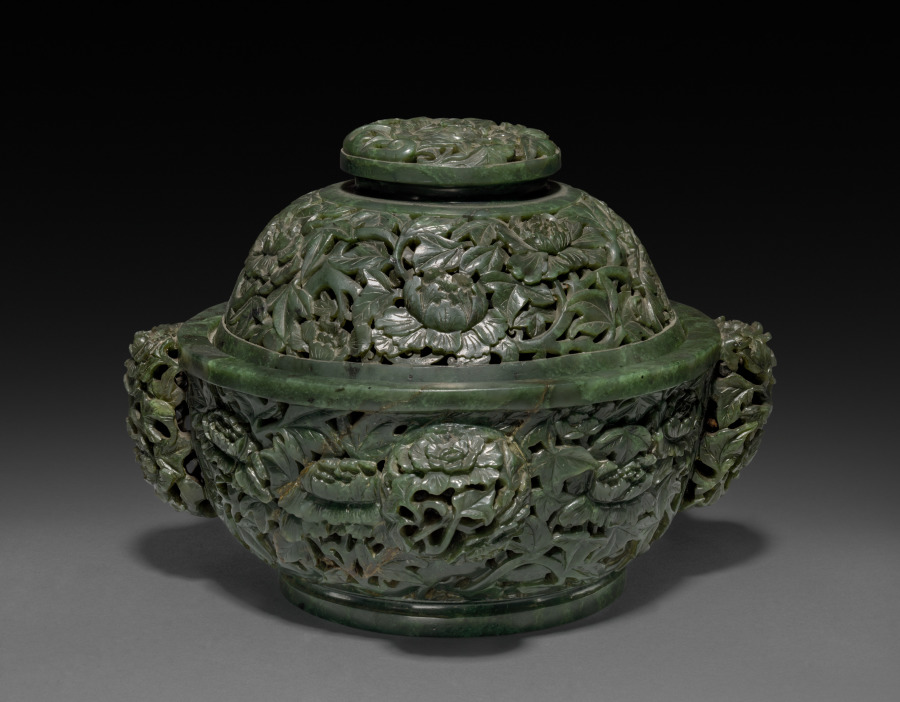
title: Fragrance Container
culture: China, Qing dynasty (1644–1911), Qianlong reign (1736–95)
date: 1736–95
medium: jade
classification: Jade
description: In the Qing (1644–1911) dynasty, luxury items became more affordable to larger parts of the society, including women, merchants, and literati in non-official positions. Imperial patronage and a growing urban population encouraged consumption of luxury goods and local craftmanship. This spinach-green jade incense burner has pierced floral designs and four pierced floral handles. It illustrates the superb carving skills and the creative mind of its accomplished creator, who sought clients on a competitive market